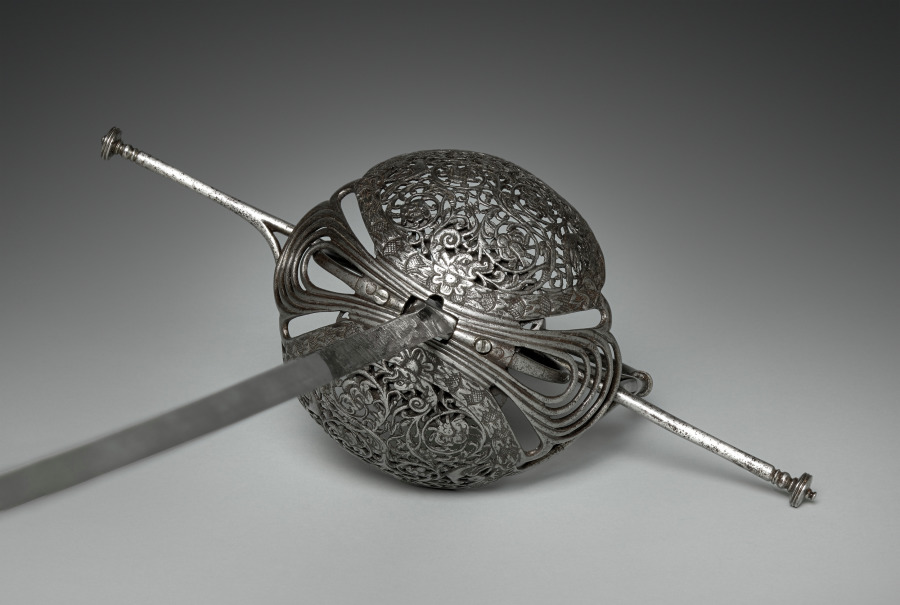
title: Rapier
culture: Spain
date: c. 1650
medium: steel, pierced and chiseled, leather and wood grip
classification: Arms and Armor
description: The rapier was a sword worn with civilian dress and used in duels. The term rapier derives from a 16th-century French word rapière, which in turn derived from the Spanish espada ropera, or “dress sword.” The rapier was a light weapon with a straight double-edged and pointed blade that, with the development of the art of fencing in the 1500s and 1600s, gradually became narrower and lighter, and thus suitable for thrusts only. With the new technique of swordplay emphasizing the point of the blade, sword guards became more complex to protect the duelist’s unarmored hand. These elaborate guards were frequently decorated by various techniques—chiseling, bluing, russeting, and damascening.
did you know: Many civilians wore swords for self defense and for settling disputes by dueling; the swords often reflected contemporary taste and fashion.